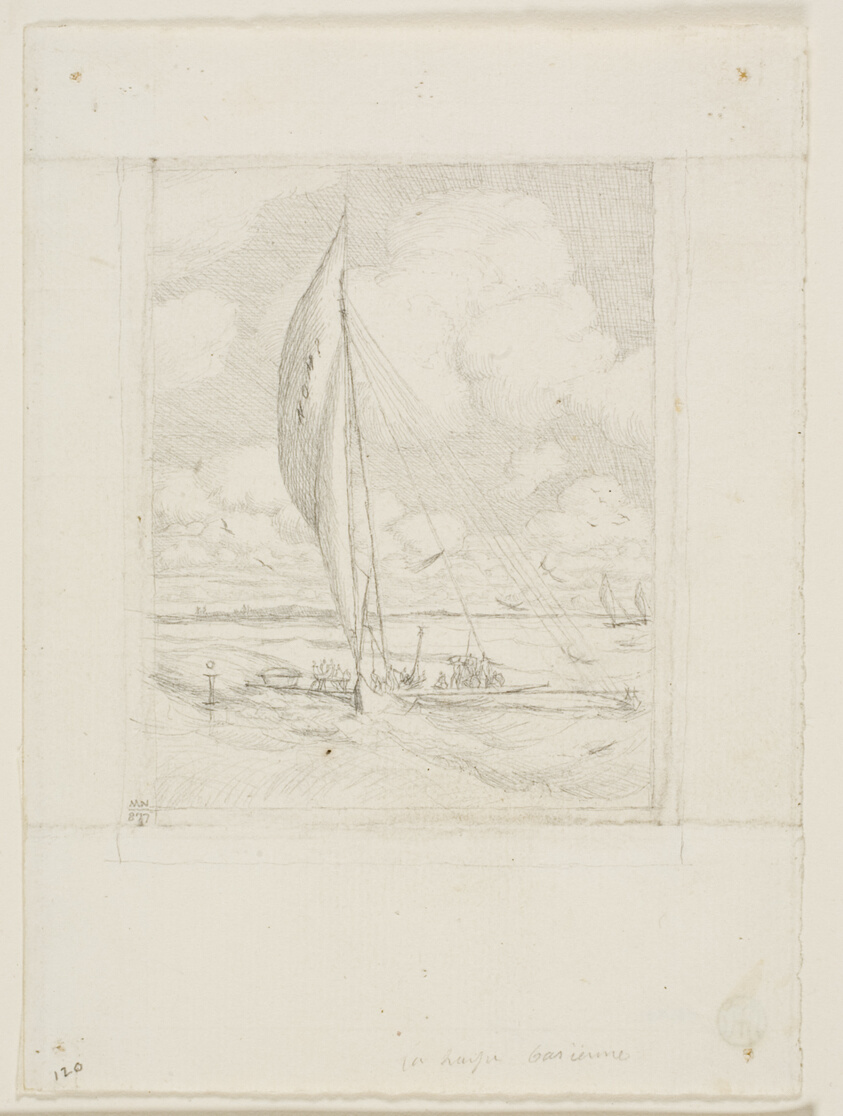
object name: Drawing and Watercolor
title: Swift-Sailing Proa, Mulgrave Archipelago, Oceania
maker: Charles Meryon (French, 1821-1868)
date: 1866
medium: Graphite on ivory laid paper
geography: France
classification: graphite; drawings (visual works); prints and drawing